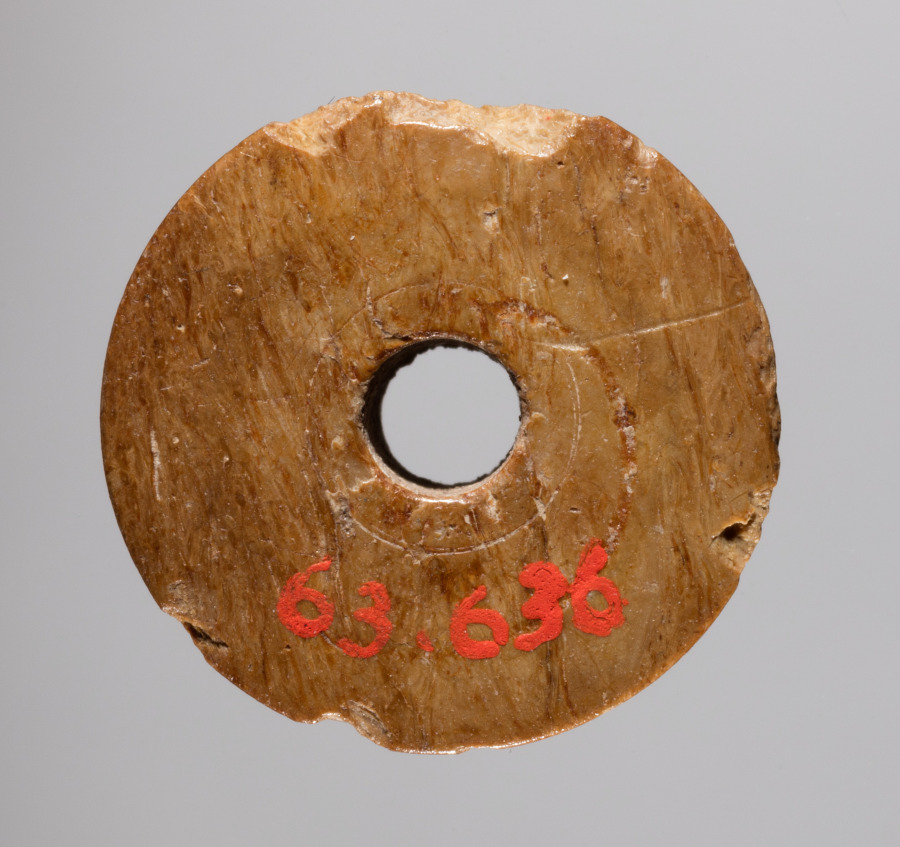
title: Spindle Whorl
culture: Iran, early Islamic period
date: 700s - 900s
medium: bone, incised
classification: Spindle Whorl